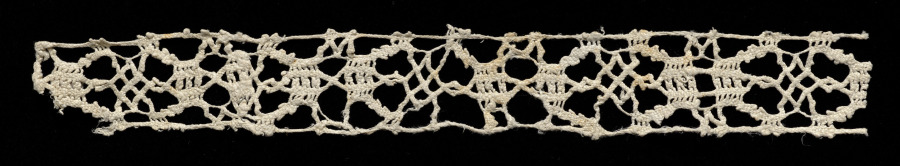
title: Lace Insertion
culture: Italy, Venice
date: 1540–60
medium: Bobbin lace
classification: Lace